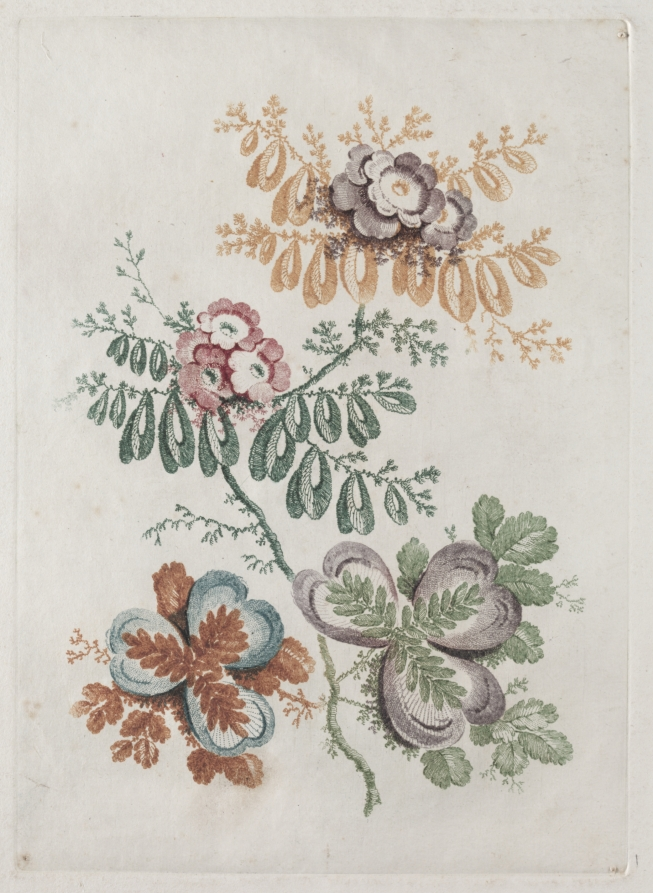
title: New Suite of Portfolios of Flowers Ideal to Use for Designing and Painting: Floral Fantasies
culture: England, 18th century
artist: Anne Allen (British)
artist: after Jean Baptiste Pillement (French, 1728–1808)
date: c. 1796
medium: color etching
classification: Print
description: As a painter and decorative artist,Jean Baptiste Pillement ornamented a broad range of objects including ceramics, textiles, and other household objects. He employed several printmakers to copy his designs that were then disseminated throughout Europe. The best of the printmakers, Anne Allen, colored the etched plate à la poupée. Instead of making a plate for each color, a single plate is selectively inked in different colors using stumps of rags, known as dolls (poupée in French), so that the complete design is printed at one time.